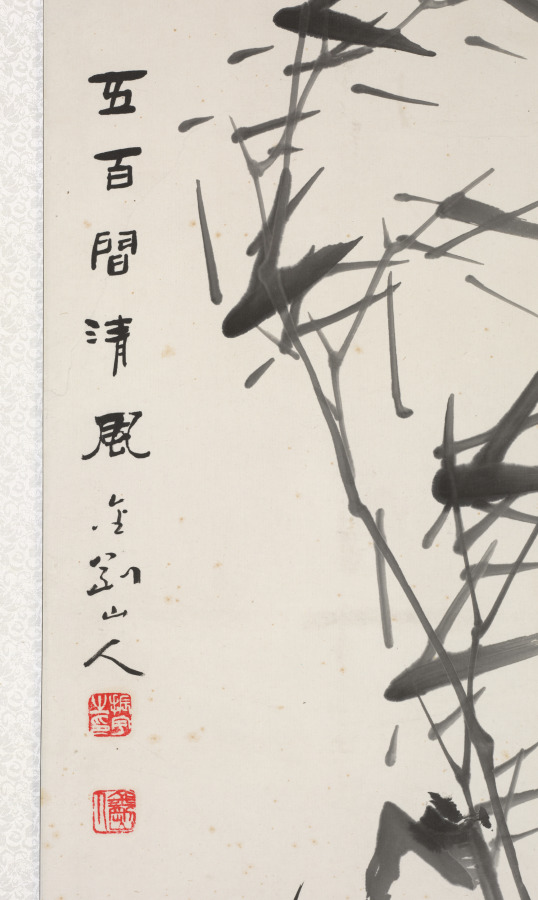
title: Bamboos in Wind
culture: Korea, Japanese colonial period (1910−1945)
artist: Kim Jin-woo (Korean, 1883–1950)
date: 1934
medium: Ten-panel folding screen; ink on paper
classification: Painting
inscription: Two chops stamped on each panel: 振宇之印 (Jinwoo’s Seal); 金剛山人 (Diamond Mountain Man)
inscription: Inscription written on the far-left panel: 甲戌流??寫於竹林堂金剛山人振宇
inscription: Inscription written on the 8th panel: 五百間淸風金剛山人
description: Active during the Japanese colonial period in Korea (1910–45), the artist Jin-woo Kim earned his artistic reputation for his expressive renditions of bamboo swaying in a strong wind. His piercing bamboo shoots are often compared to an iron spear, and their sharp leaves to a knife. It is believed that he deliberately emphasized sharpness in his brushstrokes to express his strong resistance against Japanese colonial oppression.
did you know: The artist’s prolific artistic production were a major part of fundraising efforts to support resistance activities for Korea’s independence.